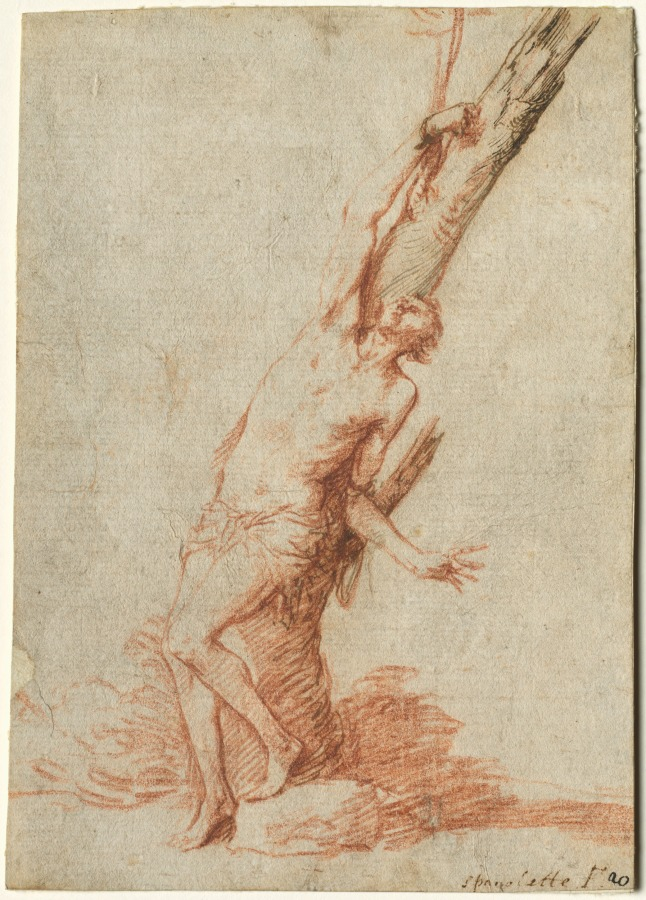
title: St. Sebastian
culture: Spain, active in Naples, 17th century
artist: Jusepe de Ribera (Spanish, 1591–1652)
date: 1626–30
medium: red chalk with pen and brown ink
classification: Drawing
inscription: lower right, in brown ink: spanolette.F; lower right, in black ink: [20?]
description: This subtly drawn study in red chalk with ink accents depicts the moment just before the Roman soldier Sebastian was shot through with arrows for refusing to renounce his Christian faith. The young martyr turns hopefully toward heaven as if comforted by divine light. Ribera favored the subject because it allowed him to study the expressive possibilities of the bound human figure. A number of related drawings by the artist from the same period treat similar themes of saints bound in punishment. Although Spanish by birth, Jusepe de Ribera spent most of his life in Naples, where he became the dominant artistic figure until his death in 1652.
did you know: This is one of a group of drawings by Jusepe de Ribera that represent male saints in scenes of torture and deprived of physical liberty.